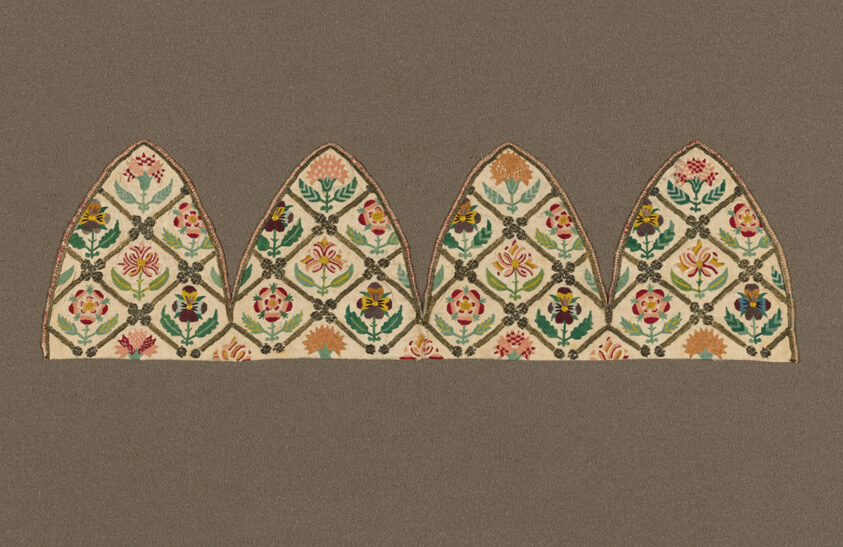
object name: Costume and Accessories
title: Man's Cap (Unassembled)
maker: England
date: 1601/25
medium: Linen, plain weave; embroidered with silk and gilt-metal-strip-wrapped silk in bullion, buttonhole, couched buttonhole, chain, hollie, and single satin stitches; darned couching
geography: England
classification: textile; needlework (visual works); costume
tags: fashion